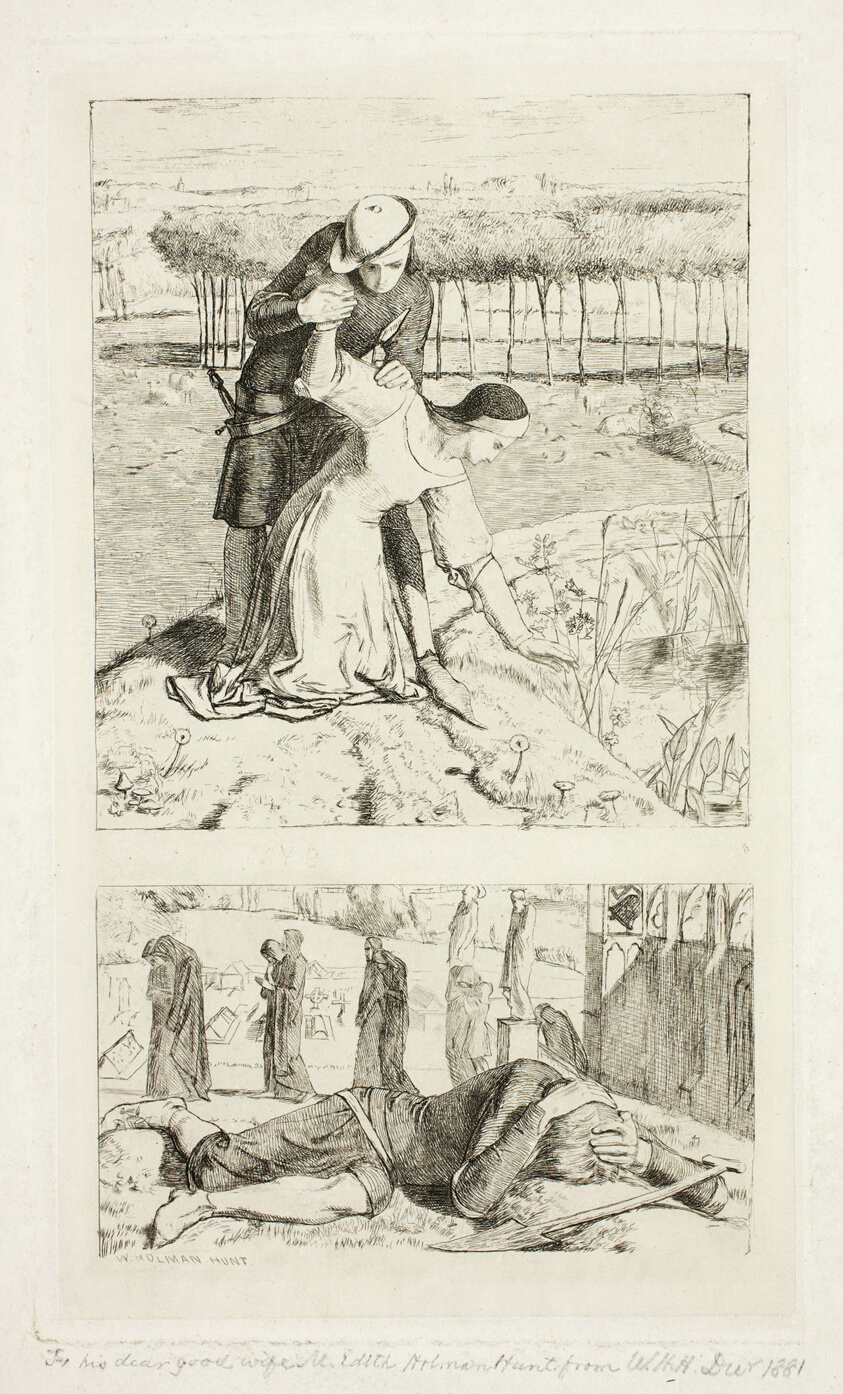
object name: Print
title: My Beautiful Lady (top); Of My Lady in Death (bottom), frontispiece to The Germ, No. 1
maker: William Holman Hunt (English, 1827-1910)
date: 1850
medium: Etching on chine paper, laid down on ivory wove paper (chine collé)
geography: England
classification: etching; print; prints and drawing